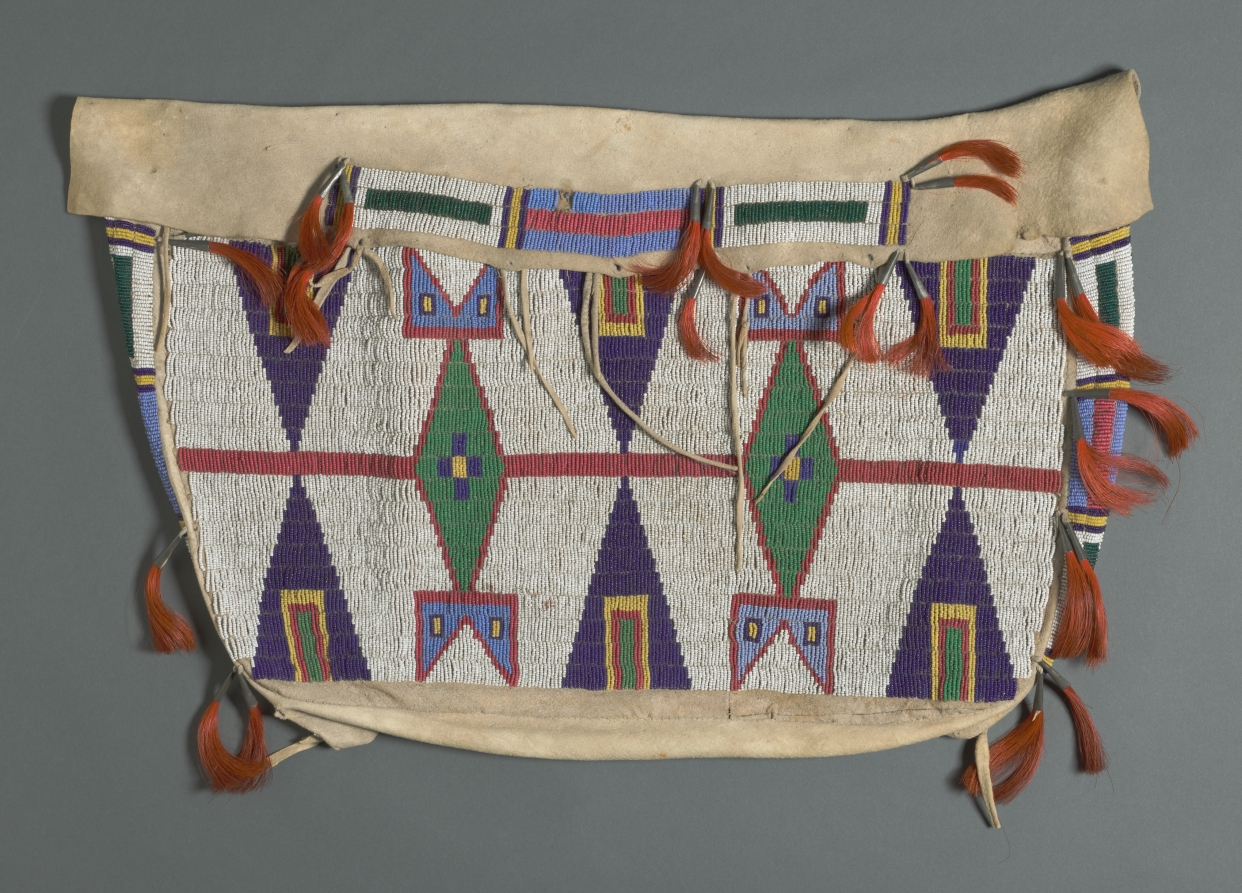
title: Storage Bag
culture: Native North America, Plains, Lakota (Sioux)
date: late 1800s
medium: Native-tanned hide, glass beads, dyed horsehair, tin cones, sinew thread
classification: Leather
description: Rectangular bags made of soft hide—known among early white traders as “possible bags” because they could hold “anything possible”—were used to store personal items inside the tipi, where they doubled as pillows. When encampments moved, the bags were carried on the side of a saddle, where their decoration could be admired.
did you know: Bags like this were used to store personal items inside the tipi, where they doubled as pillows.